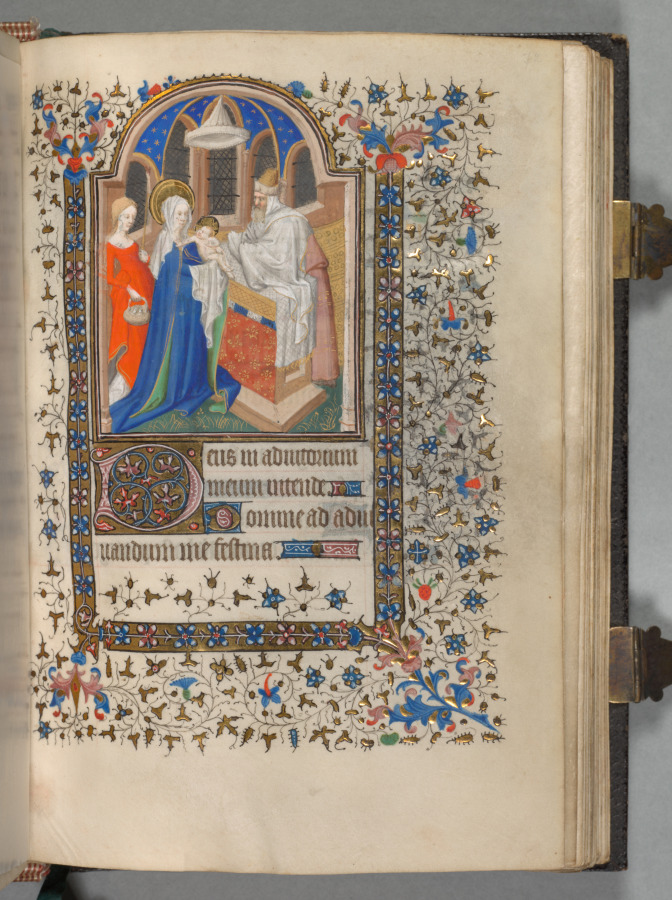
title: Book of Hours (Use of Paris): Fol. 72r, Presentation at the Temple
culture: France, Paris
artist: possibly studio or workshop of The Bedford Master (French, Paris, active c. 1405–30)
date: c. 1420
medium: ink, tempera, and gold on vellum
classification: Bound Volume